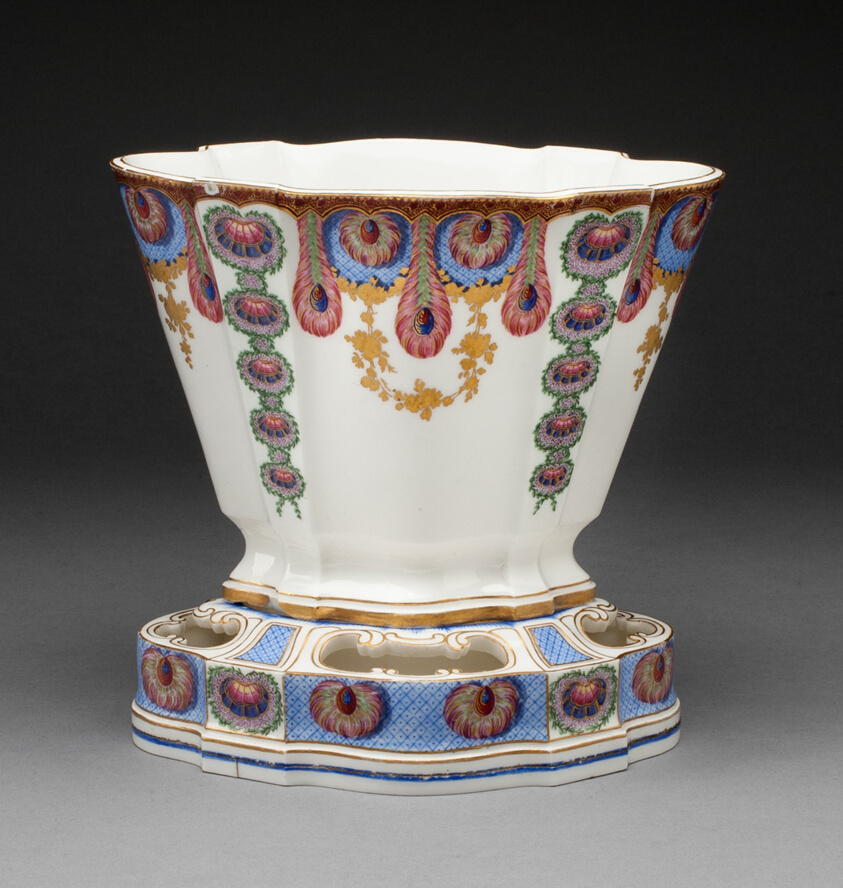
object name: Ceramics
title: Vase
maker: Sèvres Porcelain Manufactory; French, founded 1740; Painted by Louis-Jean Thévenet; French, active 1741/45-1777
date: 1761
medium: Soft-paste porcelain, polychrome enamels, and gilding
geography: Sèvres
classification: vase; vessel; ceramics; european decorative arts; porcelain